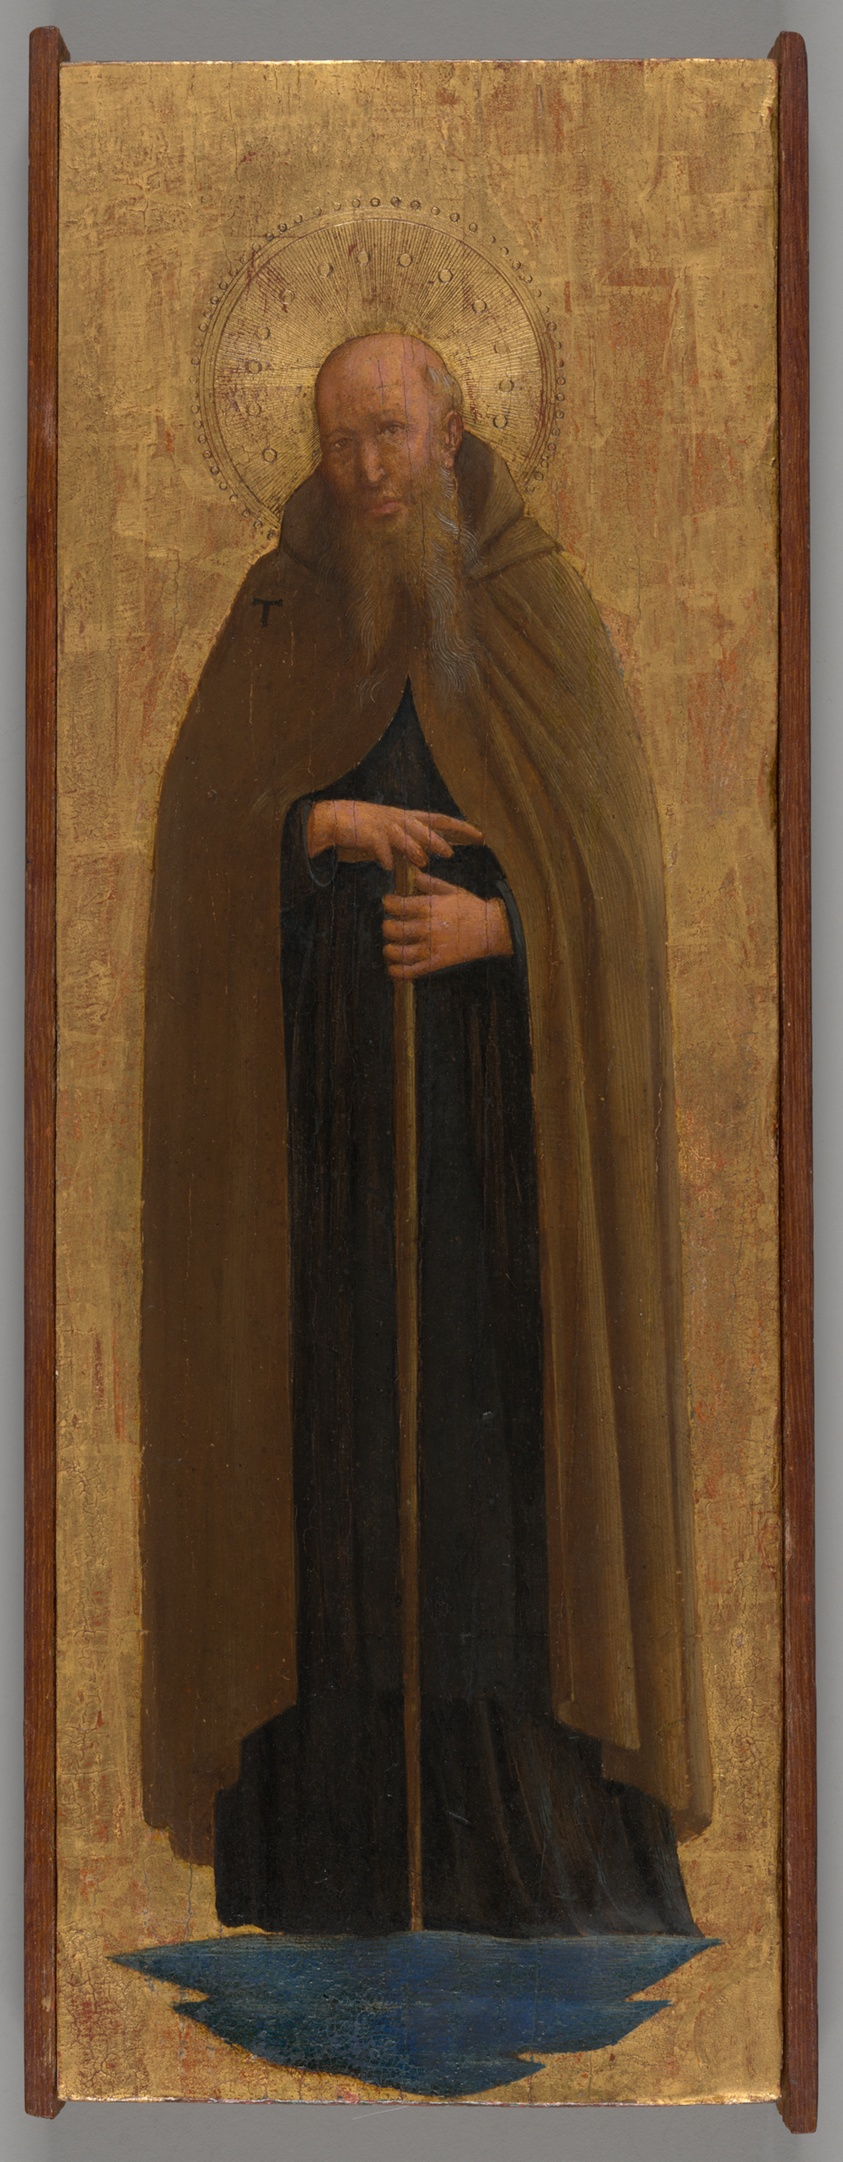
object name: Painting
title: Saint Anthony Abbot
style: 15th century, Renaissance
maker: Fra Angelico (Guido di Pietro; Italian, c. 1395/1400–1455)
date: 1440–41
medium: Tempera on panel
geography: Italy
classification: tempera; paint; painting; european painting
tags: Christianity, Christian subjects, Male, man, painting, portrait, portraits, religion, religious, religious figures, saints